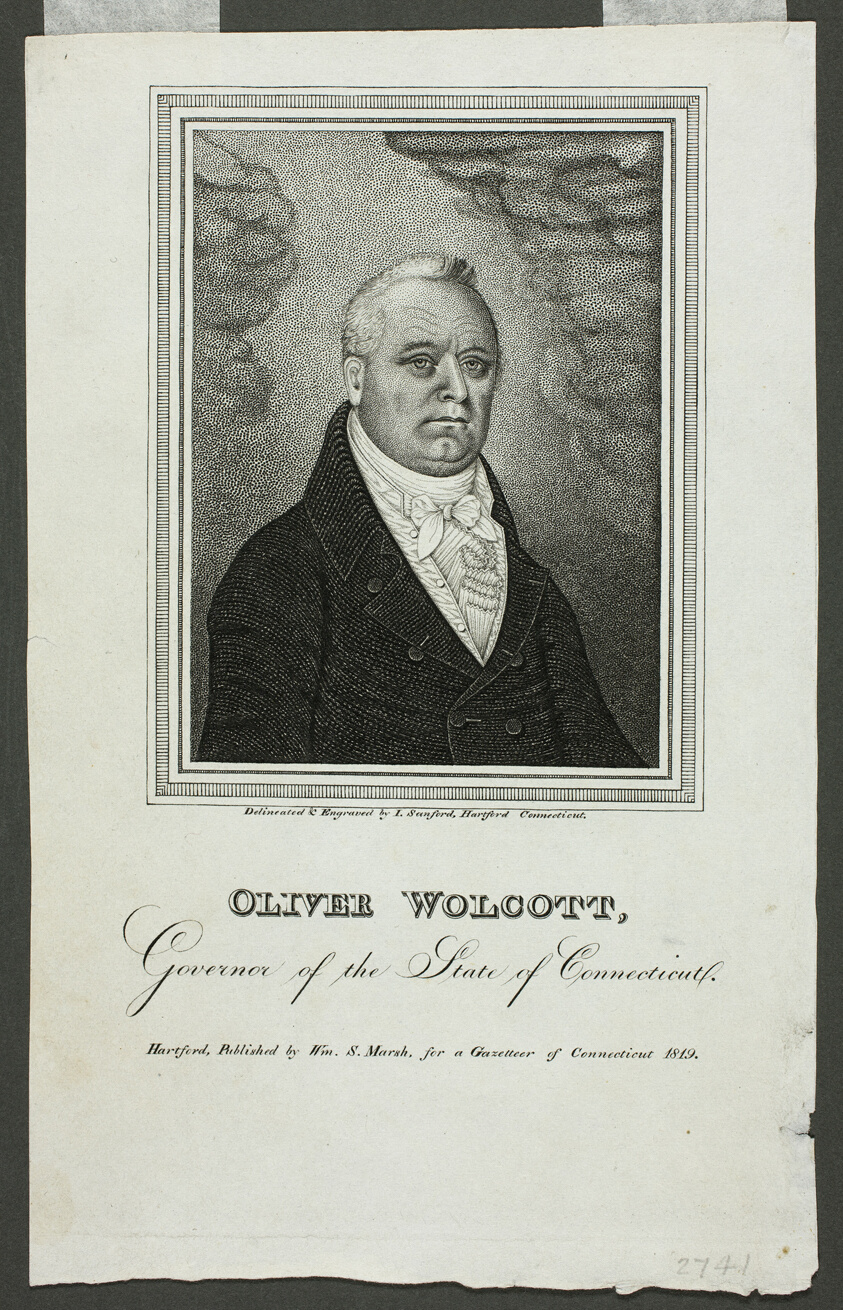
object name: Print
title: Oliver Wolcott, Governor of Connecticut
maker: Isaac Sanford (American, active 1783-1822)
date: 1819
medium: Engraving and stipple on off-white wove paper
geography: United States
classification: engraving; print; prints and drawing